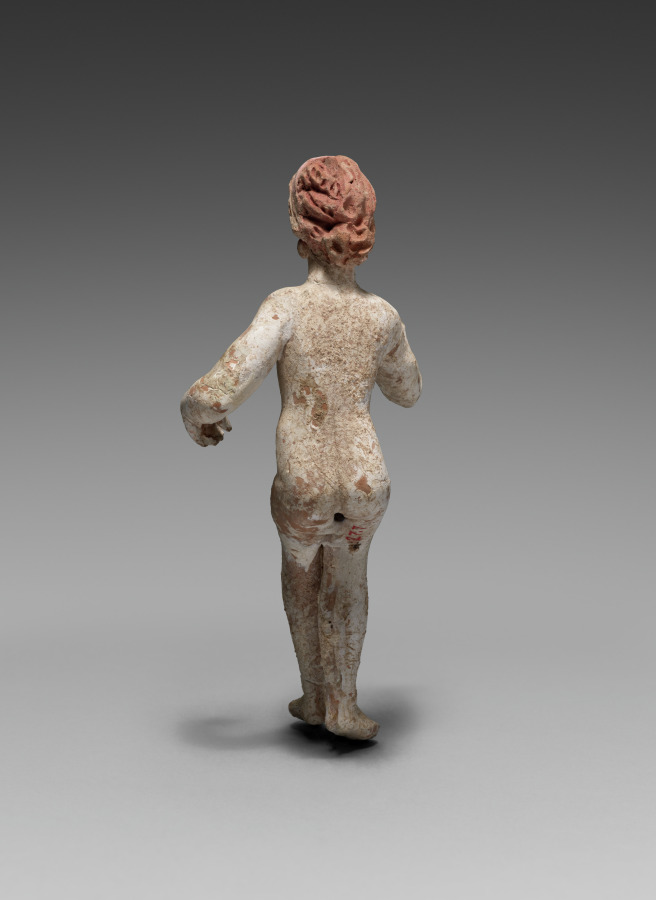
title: Figurine of a Nude Woman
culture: Greece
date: 400–200 BCE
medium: terracotta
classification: Sculpture